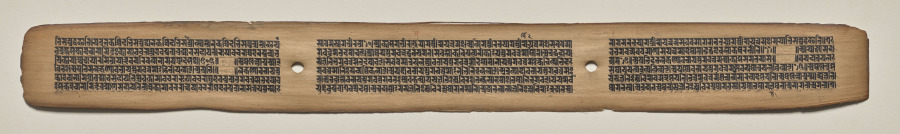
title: Text, Folio 108 (recto), from a Manuscript of the Perfection of Wisdom in Eight Thousand Lines (Ashtasahasrika Prajnaparamita-sutra)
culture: Eastern India, Bihar, Vikramashila Monastery. Painting: Nepal, Kathmandu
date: Sunday, September 14, 1119 (year 239 of the Newar Samvat in the month of Ashvina)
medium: gum tempera and ink on palm leaves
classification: Painting